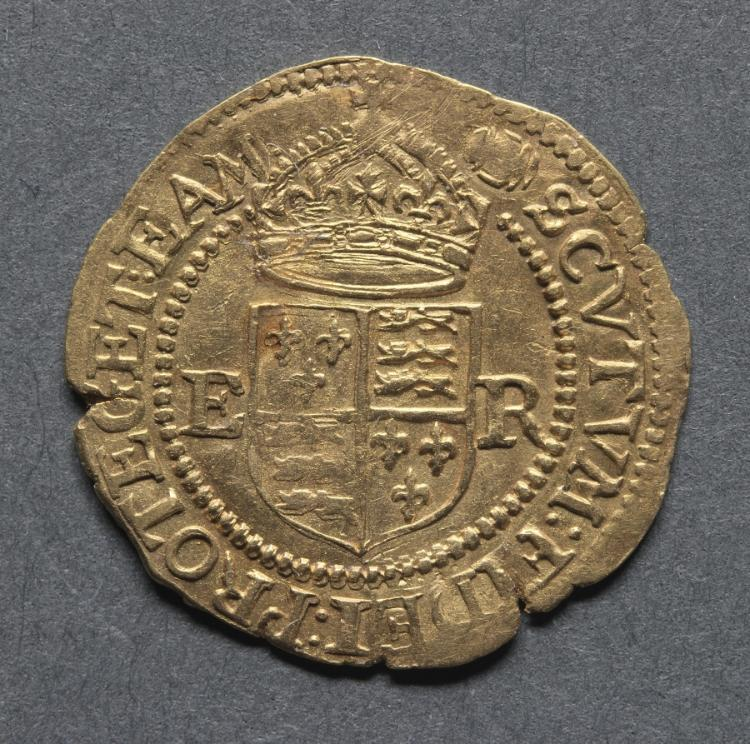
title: Halfcrown: Crowned Shield of Arms (reverse)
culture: England, Elizabeth I, 1558-1603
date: 1592–95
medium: gold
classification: Coins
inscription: SCVTVM. FIDEI. PROTEGET. EAM.